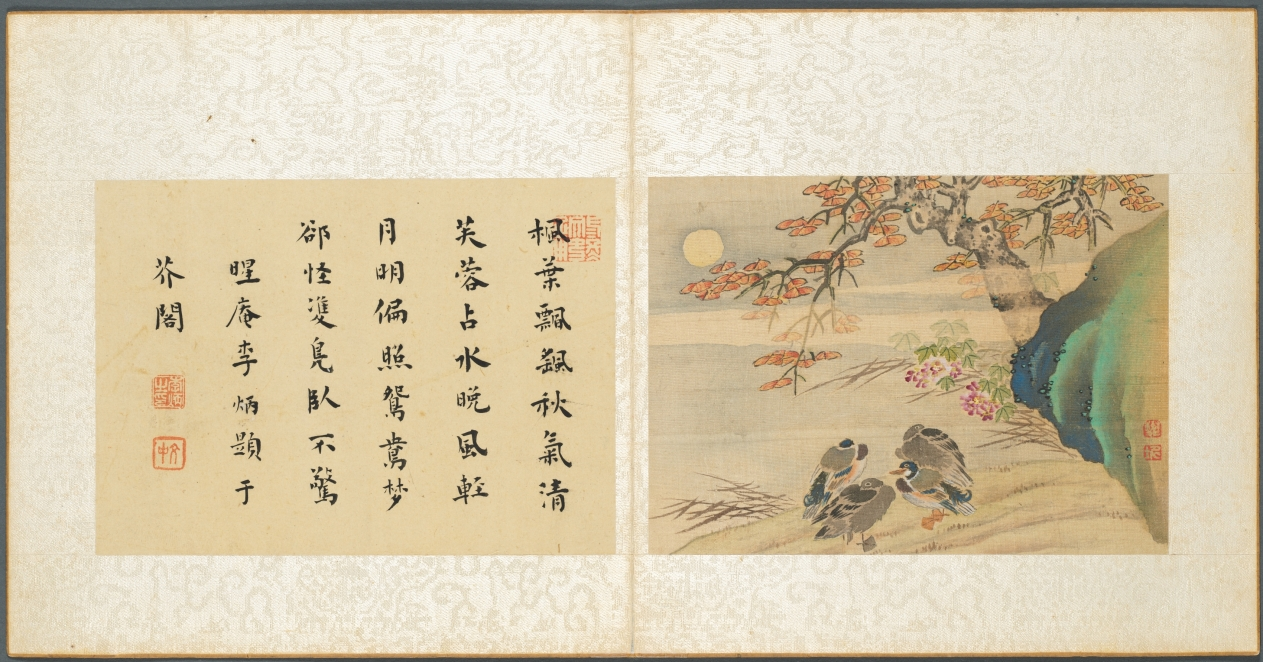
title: Album of Miscellaneous Subjects, Leaf 8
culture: China, Qing dynasty (1644-1911)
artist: Fan Qi (Chinese, 1616–after 1694)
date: early 1650s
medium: album leaf; ink and color on silk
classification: Painting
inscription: Artist seal: Fan Qi 樊圻. Poem by Li Bing 李炳 (17th century): Maple leaves drift in the wind, the autumn gusts bracing,/ Hibiscus flowers steeped with water, the evening breeze light./ The moonlight's slanting beams shine upon dreaming lovers./ No wonder that pair of fowl should dream of the absent partners.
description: Leaf 8 Li Bing's colophon reads: Maple leaves drift in the wind, the autumn gusts bracing, Hibiscus flowers steeped with water, the evening breeze light. The moonlight's slanting beams shine upon dreaming lovers. No wonder that pair of fowl should dream of their absent partners.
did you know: The rock changes from ochre to green deepening into azurite blue accented with delicate dots of malachite green.